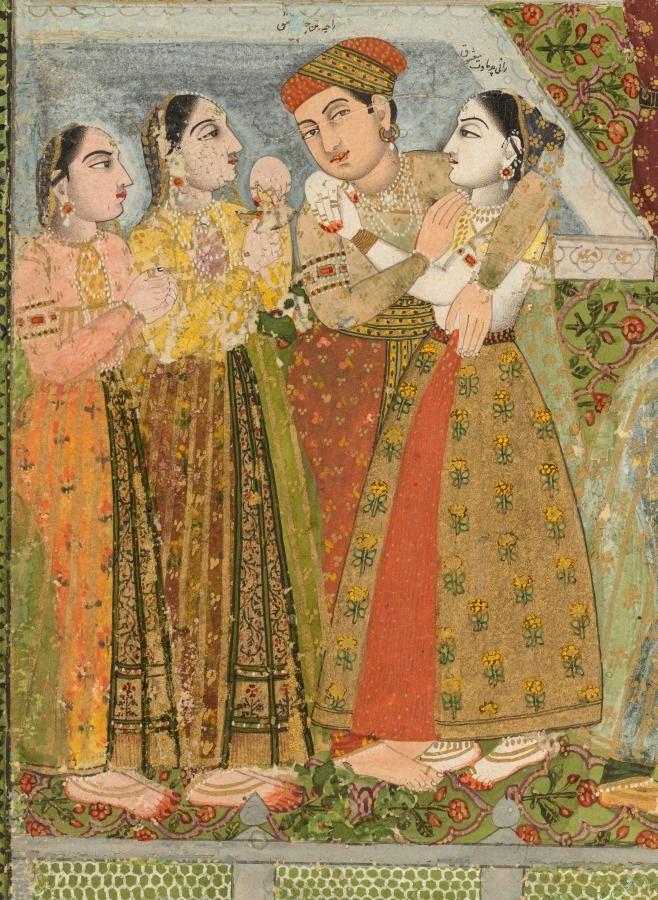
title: Lovers and beloveds: A composite of scenes from Persian, Urdu, and Sanskrit literature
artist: Chitarman II (Indian, c. 1680–с. 1750)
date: c. 1735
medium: Gum tempera and gold on paper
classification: Painting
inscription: Persian inscriptions throughout, in nasta‘liq script: Top left: The celebrated lover Ranjha; Top right, above awning: The notable ladies of the city falling into a swoon having caught sight of Joseph’s beauteous countenance; Top center, on pillar beneath canopy: The celebrated lover Vamiq; On another pillar, behind the woman’s head: The celebrated beloved ‘Azra; Upper left, on pillar: King Nala, the lover; Central figure with halo: The coming from the prison and sitting [in state] of the Lord Joseph the Prophet, with the women of the town cutting the palms of their hands and falling down unconscious; Left of center: [. . . cutting palms . . . wine cups fell from their hands . . . state of wonderment . . .]; Central pavilion at left: Sassi, the beloved the lover [Punnun]; Below central figure of Joseph: The stream of milk Shirin the beloved, weeping The death of Farhad, the lover; Lower right, in front of bearded man: Hafiz of Shiraz; Below his decanter: The stick of candy [referring to the woman with whom, according to popular lore, Hafiz was supposed to have fallen in love as a youth]; Behind the pavilion at right: Bride descending into a grave . . .; On the white railing to the left: Khwaja Bu Ali . . .; Bottom left: Queen Padmavati, the beloved, King Ratnasena, the lover; Bottom right: Majnun, the lover; On page held by Majnun: Say, “He is Allah, who is One, Allah the eternal refuge. He neither begets nor is born, Nor is there to Him any equivalent.” [Qur'an, chapter 112]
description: The figure of Joseph, identified by his halo, sits in the center near the top of this painting of heroes and heroines of ten different Persian, Urdu, and Sanskrit romances. The depicted scene occurs after Joseph has been purchased by Zulaykha in Egypt. Zulaykha, wishing to show him off to her friends and acquaintances, invites them to her home where she supplies oranges and knives. When the women see Joseph, they all are so distracted by his divine beauty that they accidentally cut their hands while peeling their oranges, but remain mesmerized by his appearance. The dramatic scene in the center is from the Persian romance of Khusrau and Shirin, in which Farhad, a stonecutter who loved Shirin, threw himself to his death from a mountaintop after hearing news of Shirin’s death, falsely sent to him from his rival Khusrau. The emaciated Majnun is in the lower right corner. Every vignette has been identified with a tiny Persian inscription.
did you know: Below the bearded poet Hafiz is the woman he loved; her name was Stick of Candy.